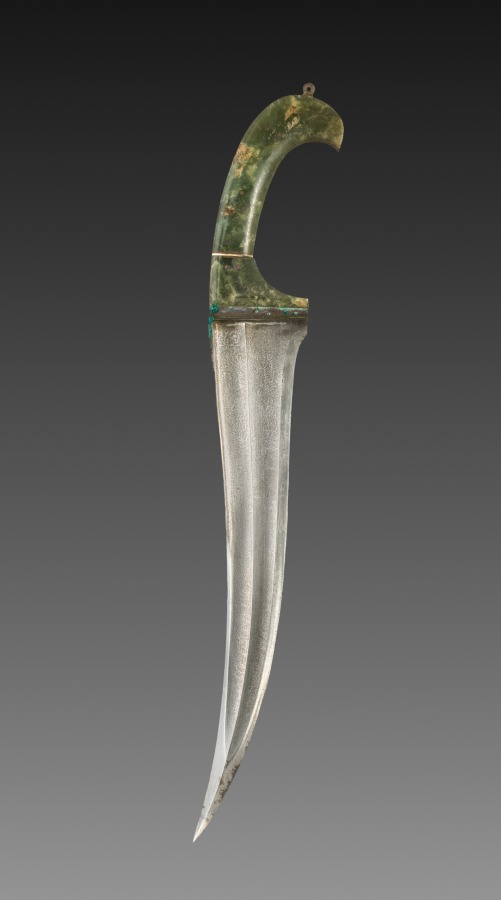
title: Dagger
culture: India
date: 1800s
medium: iron with bone and silver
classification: Arms and Armor